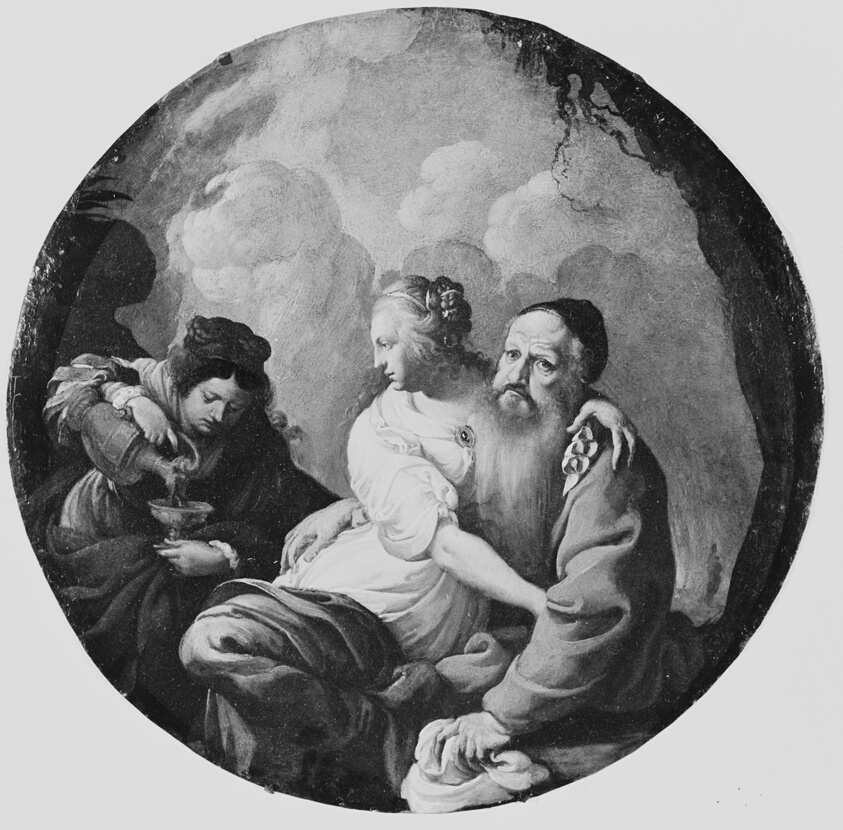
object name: Painting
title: Lot and his Daughters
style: sixteenth century, 16th Century, 17th Century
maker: School of Johann Liss, the younger (German, c. 1597–1631)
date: 1600–50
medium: Oil on copper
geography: Germany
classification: painting; german; oil on copper; oil paintings (visual works); paint; european painting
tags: fathers, wine, cave, religious scenes, religious figures, religious, religion, Old Testament, biblical, trees, wilderness, nature, families, women, woman, man, men, daughters